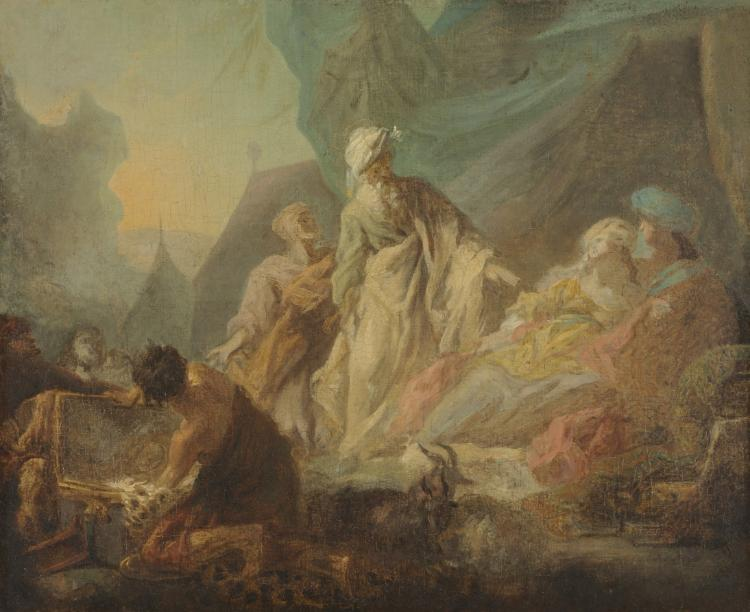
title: Laban Searching for His Stolen Gods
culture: France, 18th century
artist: Augustin de Saint-Aubin (French, 1736–1807)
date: 1753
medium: oil on canvas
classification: Painting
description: This painting is a sketch for a special competition in 1753 held by the Royal Academy in Paris. After the Grand Prix de Rome, the academy's top student prize, an unexpected vacancy in the school's branch in Rome required the academy to hold another contest. Saint-Aubin's oil sketch was well received and he won first place among three finalists. However, his final canvas, now in the Louvre, failed to garner him this distinguished award. Saint-Aubin eventually abandoned his goal of becoming a member of the Royal Academy and joined the less-prestigious Academy of St. Luke. The subject of Saint-Aubin's sketch, selected by the academy, comes from the Old Testament book of Genesis (31:33–35). After toiling for Laban for 14 years, Jacob fled with his wife, Rachel, who was also Laban's daughter. Unbeknownst to Jacob, Rachel had stolen her father's idols before their departure to secure her right to her first born. Laban tracks down Jacob and Rachel and accuses them of carrying off his idols. Jacob is still unaware of Rachel's previous actions, and she has hidden the gods under a camel saddle on which she sits.